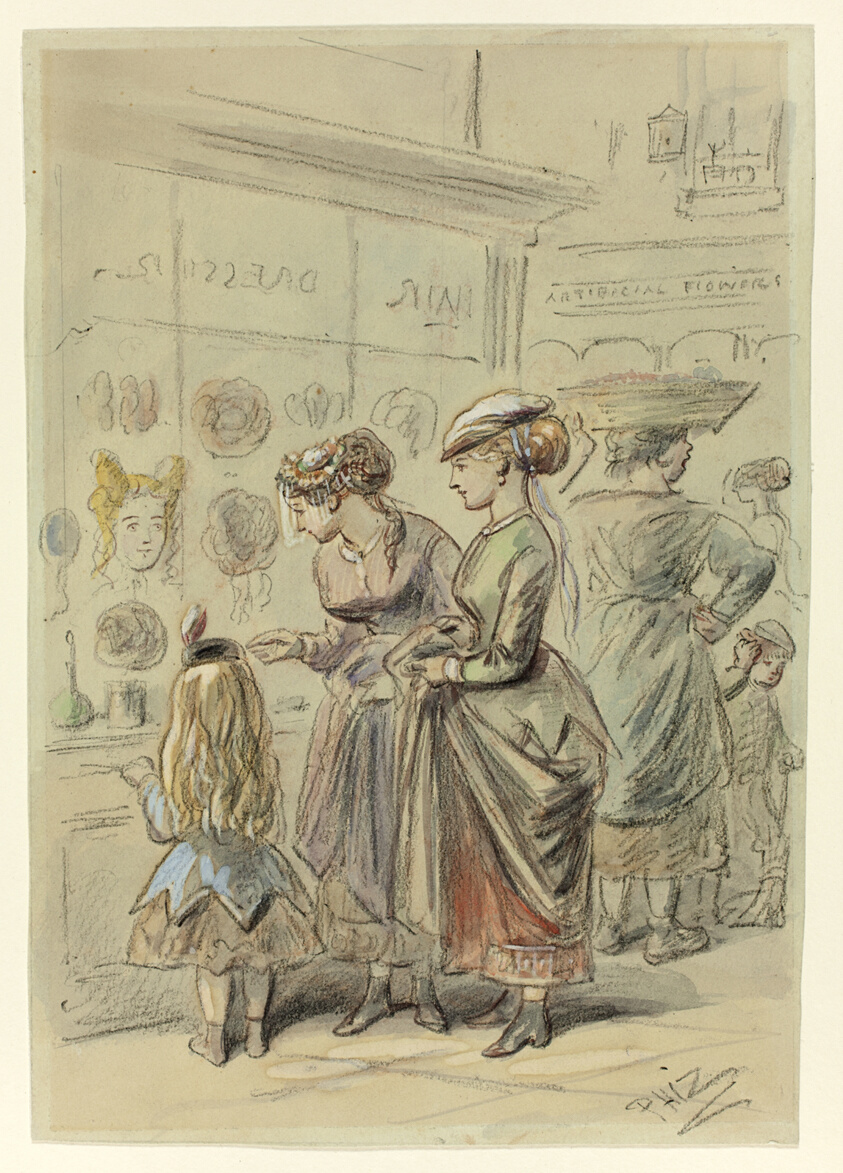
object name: Drawing and Watercolor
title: Two Ladies and Little Girl Before Hairdresser's Shop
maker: Hablot Knight Browne (English, 1815-1882)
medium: Watercolor and black crayon, heightened with touches of white and blue gouache, on grayish-green wove paper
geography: England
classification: watercolor; drawings (visual works); prints and drawing